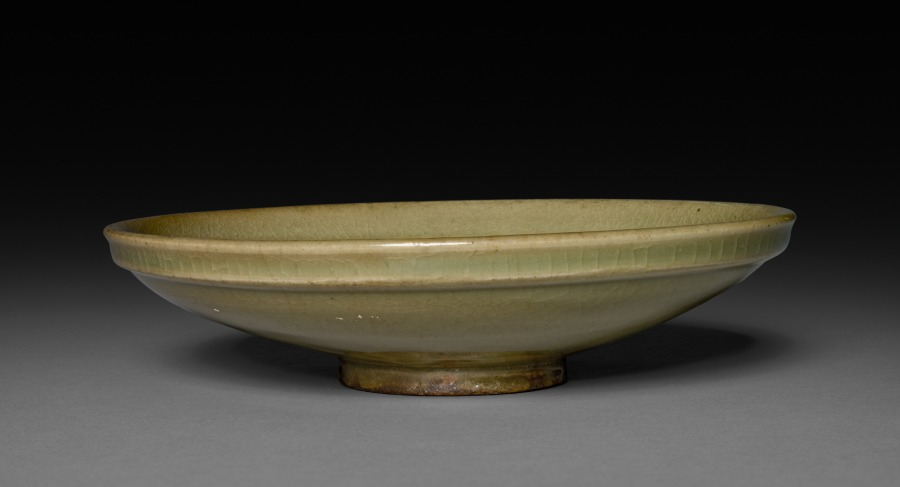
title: Saucer: Northern Celadon Ware, Yaozhou type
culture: China, late Northern Song dynasty (960-1127) - Jin dynasty (1115-1234)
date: 1100s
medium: glazed stoneware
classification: Ceramic